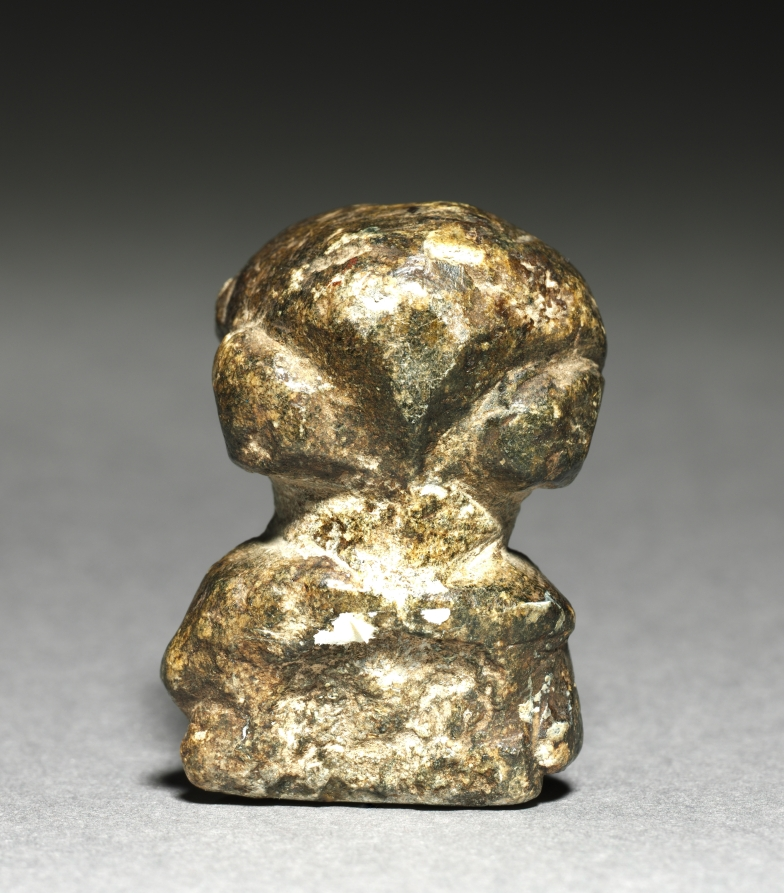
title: Female Figure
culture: Africa, West Africa, Sierra Leone, Sherbro Island, unknown maker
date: 1500s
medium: soapstone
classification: Sculpture